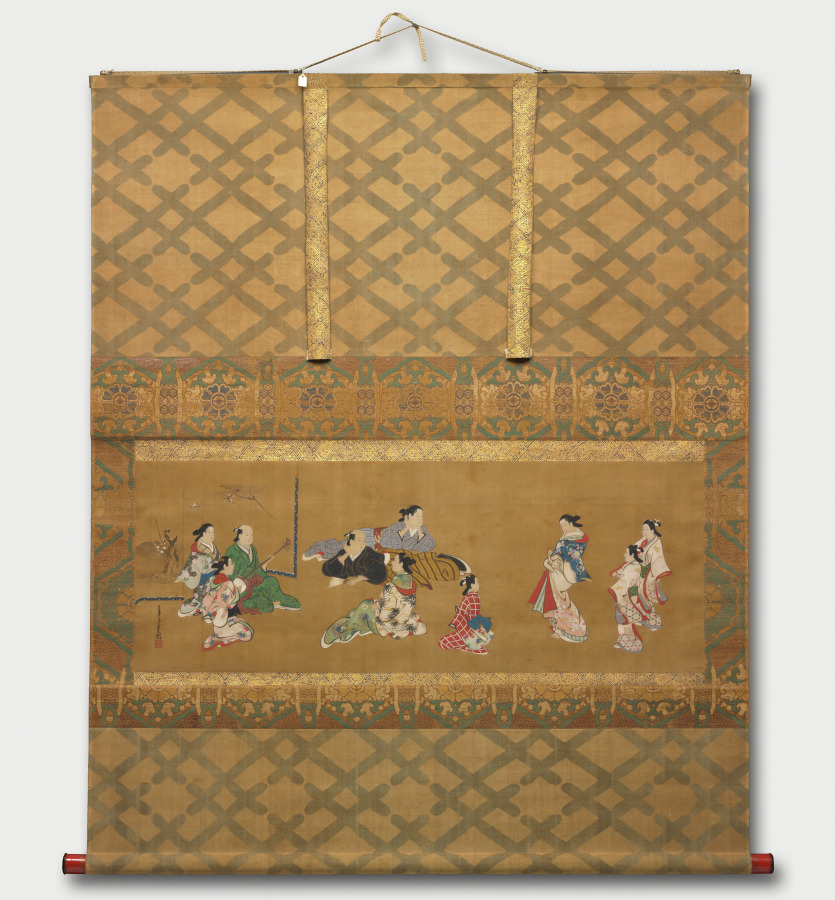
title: Entertainment Scene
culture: Japan, Edo period (1615–1868)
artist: Miyagawa Chōshun (Japanese, 1683–1753)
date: c. 1710–53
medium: hanging scroll; ink and color on silk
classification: Painting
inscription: artist's signature and seal lower left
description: This painting captures the moment when a high-ranking courtesan accompanied by two trainees makes her grand entrance into a salon. The guest of honor, a samurai who reclines beneath a striped robe while dangling his fan, turns from the musical entertainment to gaze at the spectacle of her arrival. The fortunes of everyone in the room depend on how she orchestrates the rest of the evening, as the more the samurai spends on her services, the more trickles down to the other entertainers who are present.